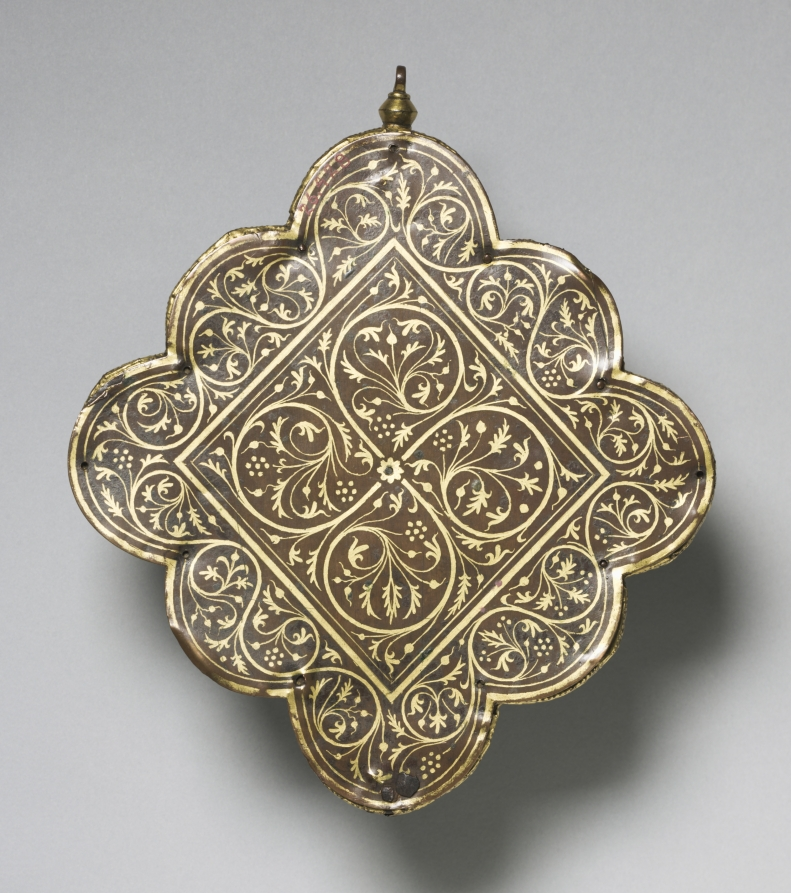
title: Pendant with the Virgin and Child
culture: Mosan, Meuse Valley, Romanesque period, 12th century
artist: circle of Godefroid de Huy (Netherlandish)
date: c. 1160–1170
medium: gilded copper, champlevé enamel; the reverse decorated in vernis brun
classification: Enamel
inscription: S[AN]C[T]A MARIA MATER D[OMI]NI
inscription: HVMILITAS; VIRGINITAS; MISERICORDIA; PIETAS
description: This pendant was made in the Rhine-Meuse region—now in modern Belgium—renowned for the production of fine metalwork objects, especially enamels. An enamel plaque depicting the enthroned Virgin and Christ child dominates the pendant. Four peripheral enamels depict angelic figures representing virtues: Humility, Virginity, Piety, and Mercy, each identified by an inscription. The pendant may have been made to serve as a reliquary to house a consecrated host. The refined craftsmanship and costly materials fittingly honor these sacred remains.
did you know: The outer lobes contain cabochons, gemstones that have been shaped and polished resulting in a rounded top and flat bottom, of garnet, glass, and quartz.